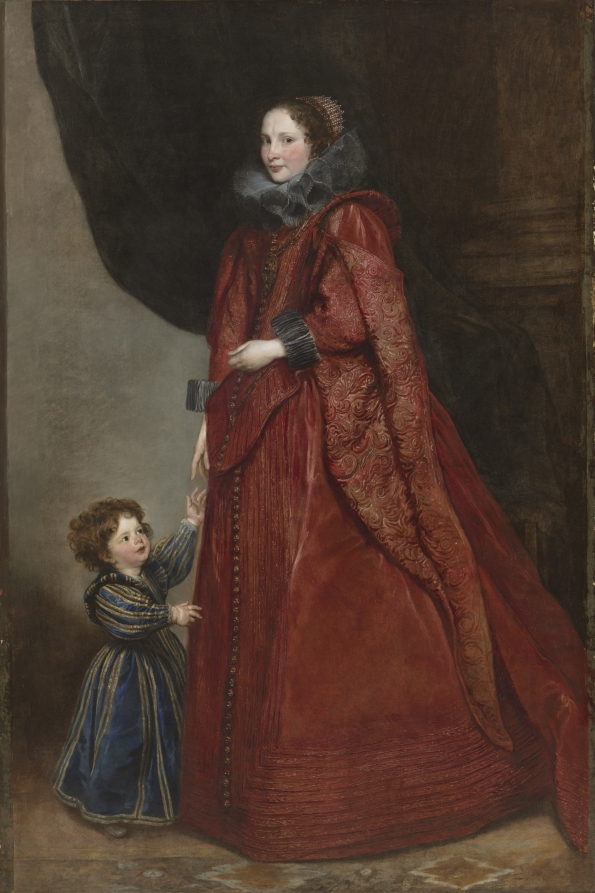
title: A Genoese Lady with Her Child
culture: Flanders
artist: Anthony van Dyck (Flemish, 1599–1641)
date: c. 1623–25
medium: oil on canvas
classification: Painting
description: Prior to the 1600s, large, full-length portraits of wealthy clients usually emphasized the trappings of status above any other qualities. The accuracy of the likeness and vivacity of the person remained subordinate to an easily readable sense of the sitter’s power and position in society. Artists such as Van Dyck transformed this tradition, which sent shockwaves through Genoa, instantly changing the direction of elite portraiture in the city. While the elaborate garb of this unidentified sitter and the scale of the image certainly mark her status, the warmth Van Dyck imparted to her face, the drama of the background, and the touching detail of the child spontaneously reaching upward add life, energy, and theatricality to the work.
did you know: This portrait was a departure from the painting style popular at this time, focusing less on a demonstrative display of wealth and status and more on capturing the essence of the sitter. Although the clothing denotes affluence, this intimate interaction between mother and child transcends class boundaries.